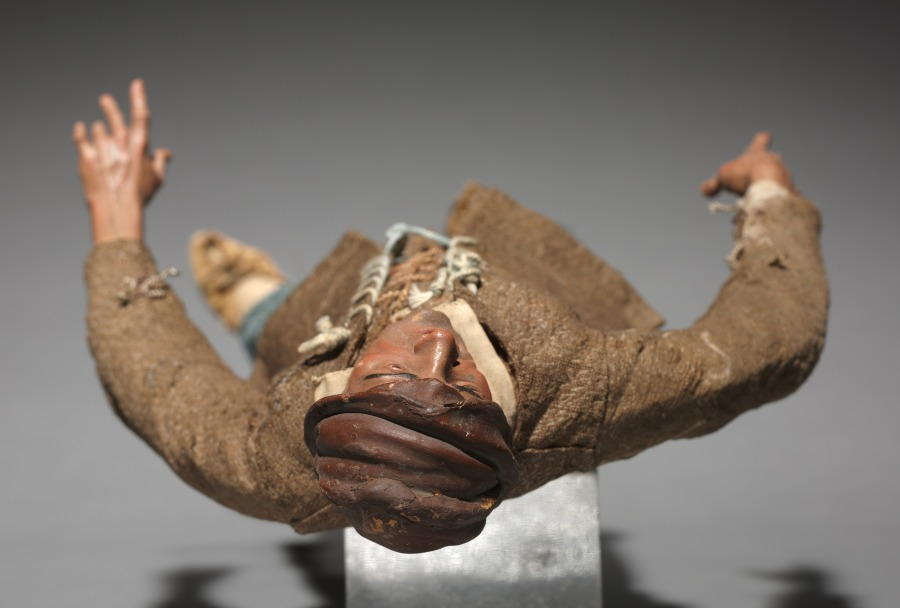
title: Figure from a Crèche: Shepherd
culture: Italy, Naples, late 18th-early 19th century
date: 1780–1830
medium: painted wood and terracotta with various textiles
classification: Sculpture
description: The practice of creating scenes of the Nativity for the home dates from the early 1700s in Italy, where people began to set up doll-like figures of about a foot or less in height. The custom was particularly popular in Naples around 1800, where crèche scenes (crèche means cradle, or crib) included many figures, whose heads and hands of painted terracotta, stuffed cloth bodies, and clothing adapted from contemporary local costumes gave them an amazingly realistic character. Representations of the birth of Jesus can be traced to the first few centuries of Christianity. Both living creatures and sculptural depictions of them were used from early times. By the late middle ages it was customary to create life-size figures of wood or stone, naturalistically painted, to represent the characters who participated in the events of Jesus's early life. These sculptures were then arranged in scenes illustrating one or both of the most important of these events, the Adoration of the Shepherds and the Adoration of the Magi-the three kings from the East who came to pay homage to the Christ child. Used in churches, these large figures were especially popular in Italy, Central Europe, Spain, and Portugal.